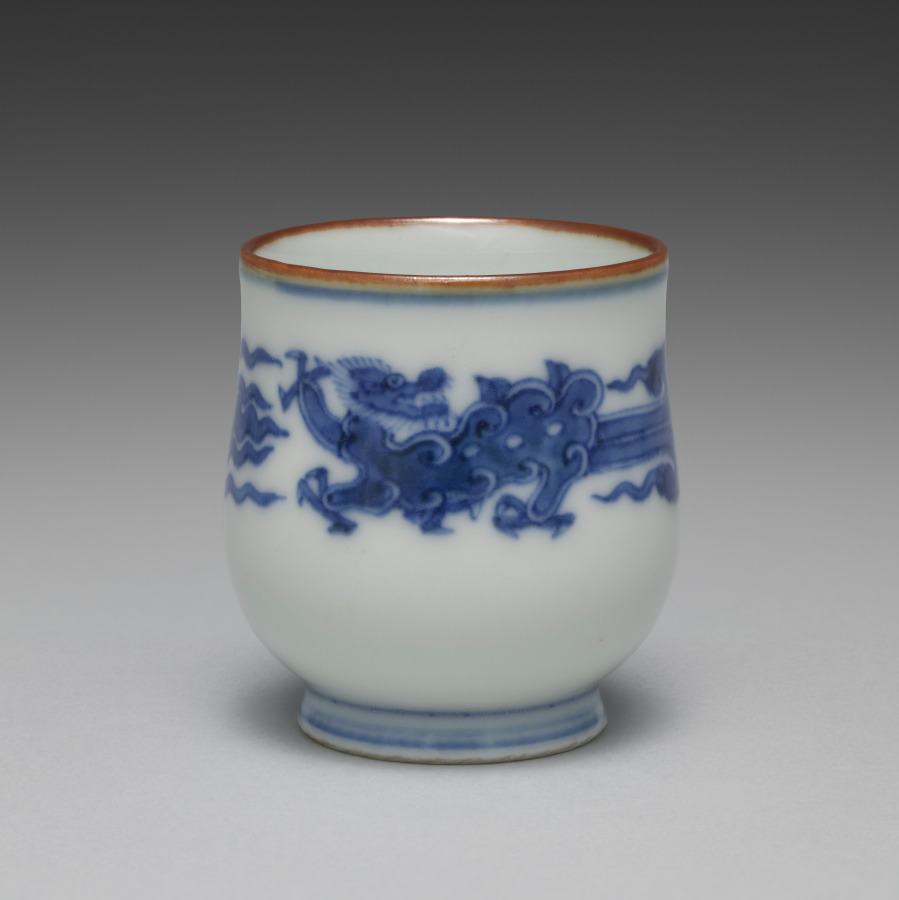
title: Cup from Sake Cups with Dragons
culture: Japan, Meiji period (1868–1912)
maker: Seifū Yohei III (Japanese, 1851–1914)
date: c. 1893–1914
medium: One from a set of six sake cups; porcelain with underglaze blue and iron oxide rims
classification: Ceramic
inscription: 大日本清風造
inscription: 清風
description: Each of these sake cups pictures two backward-looking dragons. The highly stylized creatures resemble jade carvings.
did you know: Seifū Yohei III was inspired by the Chinese mythical animals that were common on porcelain objects made at Jingdezhen in China during the Ming dynasty (1368–1644) and then exported around the world.